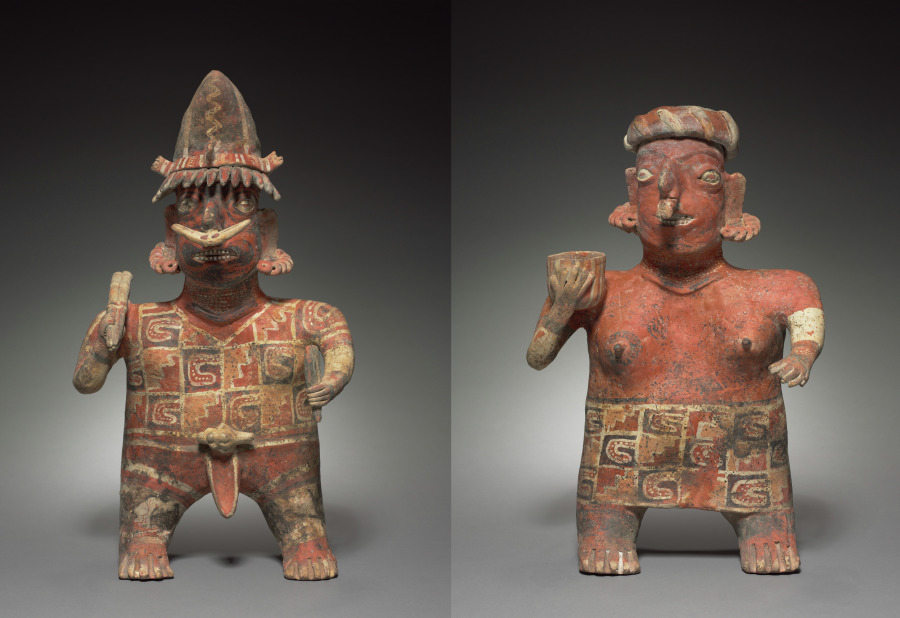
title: Pair of Standing Figures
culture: Mexico, Nayarit, Ixtlan del Rio Style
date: c. 100 BCE–300 CE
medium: earthenware with colored slips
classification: Sculpture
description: Nagarit ceramic sculputres, like those of Colima, were manufactured for burial with the dead. The popular male-female couples may be portraits of the individuals with whom they were buried. This female figure, dressed in a colorful skirt and hat, has painted or tattooed patterns on her torso and face. Jewelry adorns her face, ears, and nose. The vessel on her shoulder symbolizes her domestic duties. Like his female companion, this male figure is portrayed in all his finery. He carries spears, indicating that he is a hunter or warrior, and his confident grin conveys aggression and vitality.